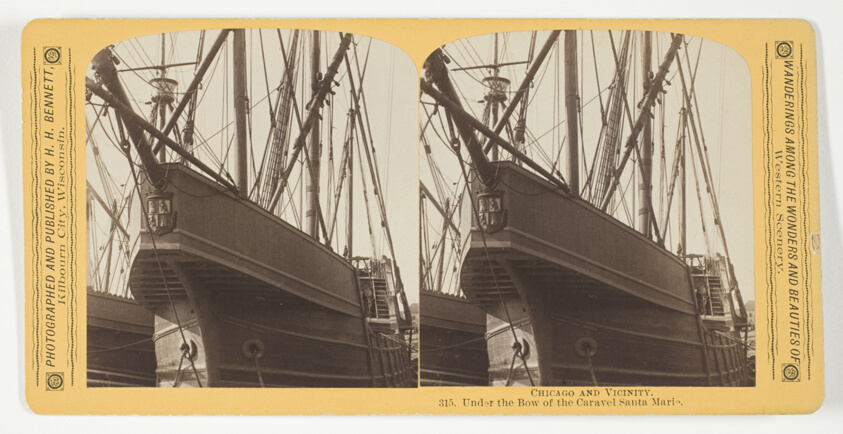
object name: Photograph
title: Under the Bow of the Caravel Santa Maria, from the series "Chicago and Vicinity"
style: 19th century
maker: Henry Hamilton Bennett (American, born Canada, 1843-1908)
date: 1887/93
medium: Albumen print, stereo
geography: Chicago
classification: photography; photograph; albumen silver print; stereograph (albumen)